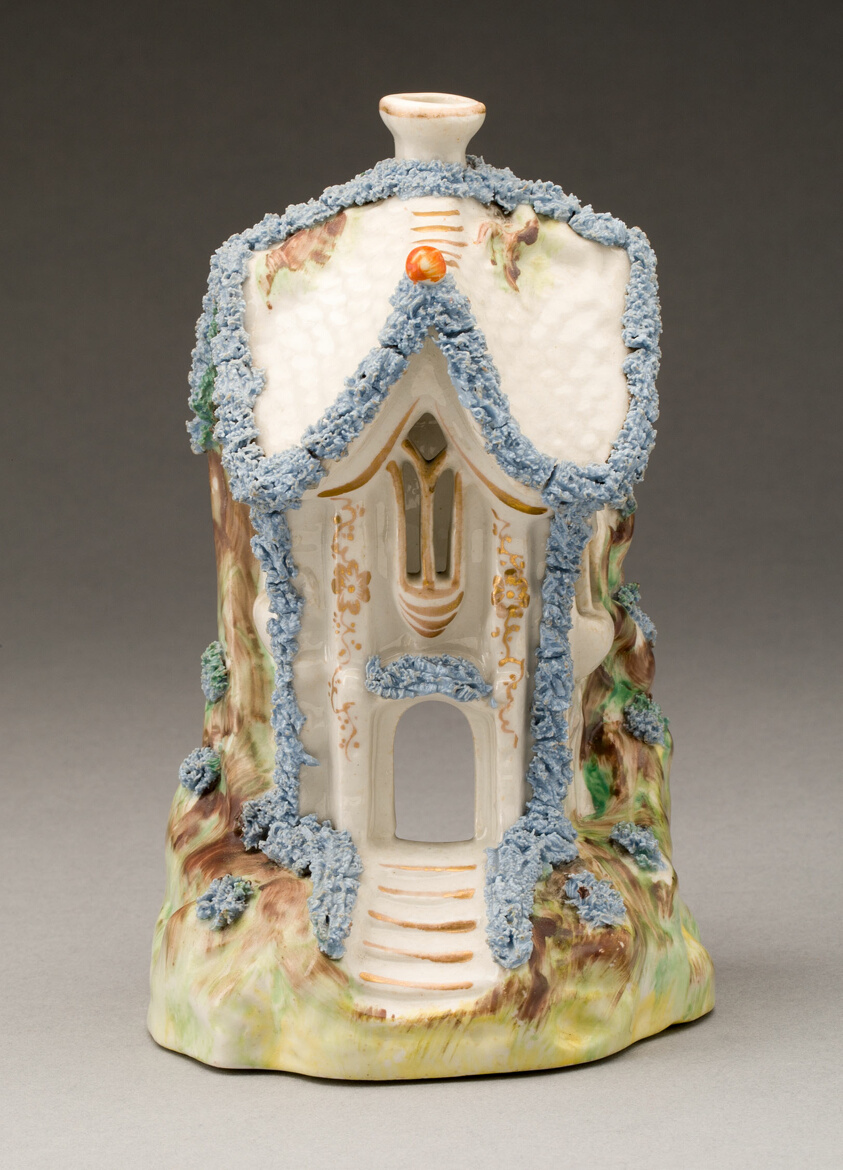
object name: Ceramics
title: Incense Burner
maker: England, Staffordshire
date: c. 1830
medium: Glazed earthenware with polychrome enamel decoration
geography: Staffordshire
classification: ceramics